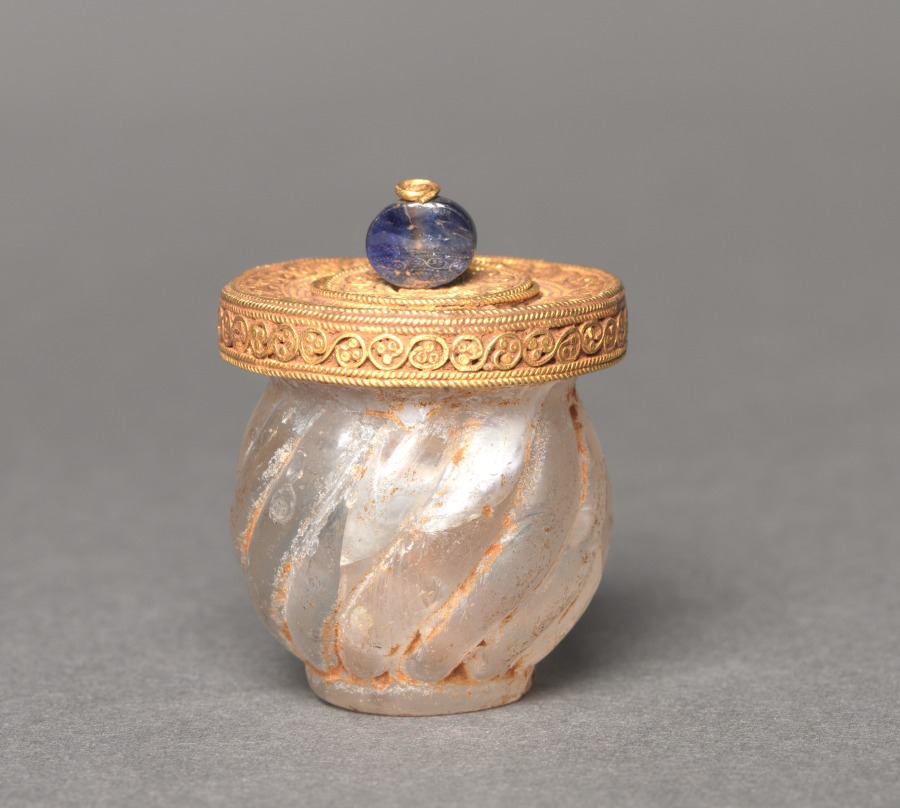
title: Cosmetic Jar with Lid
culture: Byzantium, early Byzantine period, 6th century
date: 500s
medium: gold filigree, sapphire, and rock crystal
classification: Metalwork